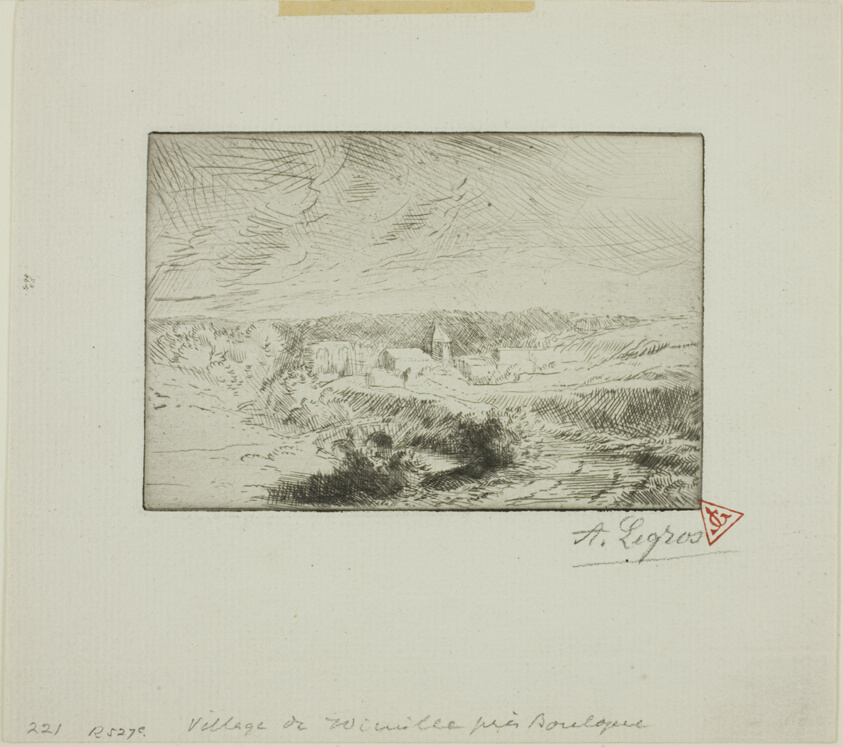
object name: Print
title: Village of Wimille, Near Boulogne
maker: Alphonse Legros (French, 1837-1911)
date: c. 1880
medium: Etching and drypoint on light green laid paper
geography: France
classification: etching; print; prints and drawing